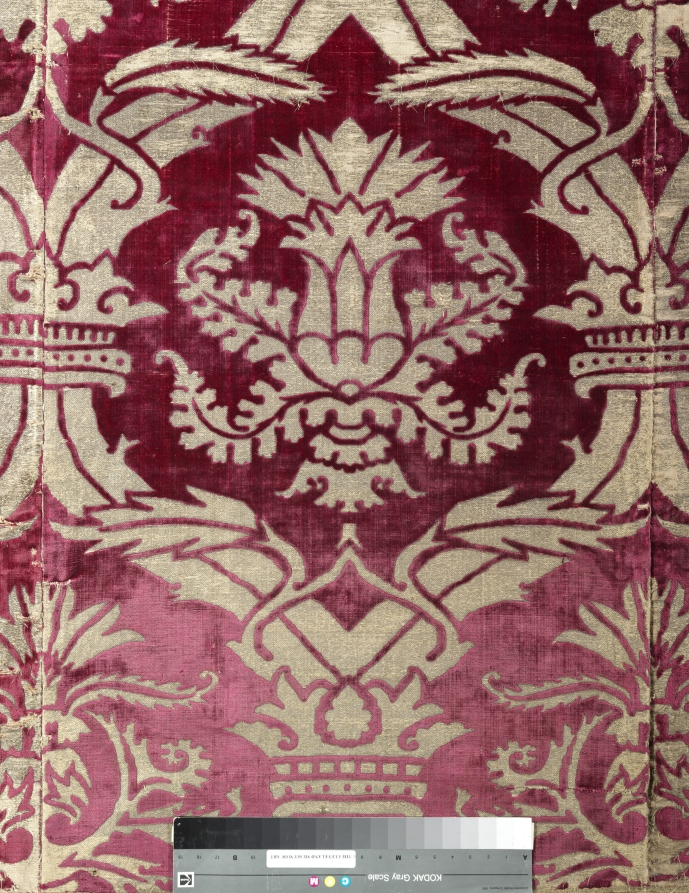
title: Brocaded Velvet Panel with Italianate Pattern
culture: Turkey, Istanbul or Bursa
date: 1575–1625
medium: Silk: velvet, brocaded; gilt-metal thread and cotton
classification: Velvet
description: Rarely are four fabric widths preserved together from any culture. This gilt-metal thread pattern combines Turkish and Italian features: the large ogival (curved) lattice clasped by crowns and the velvet structure are Turkish, and the two so-called artichoke designs are enlarged adaptations of Italian motifs. A symbol of wealth and power, this velvet panel was woven during the artistic height of the Ottoman Empire in the late 1500s. It may have covered a divan (sofa) or possibly enhanced a wall during cold winters in the imperial Topkapi Palace in Istanbul.